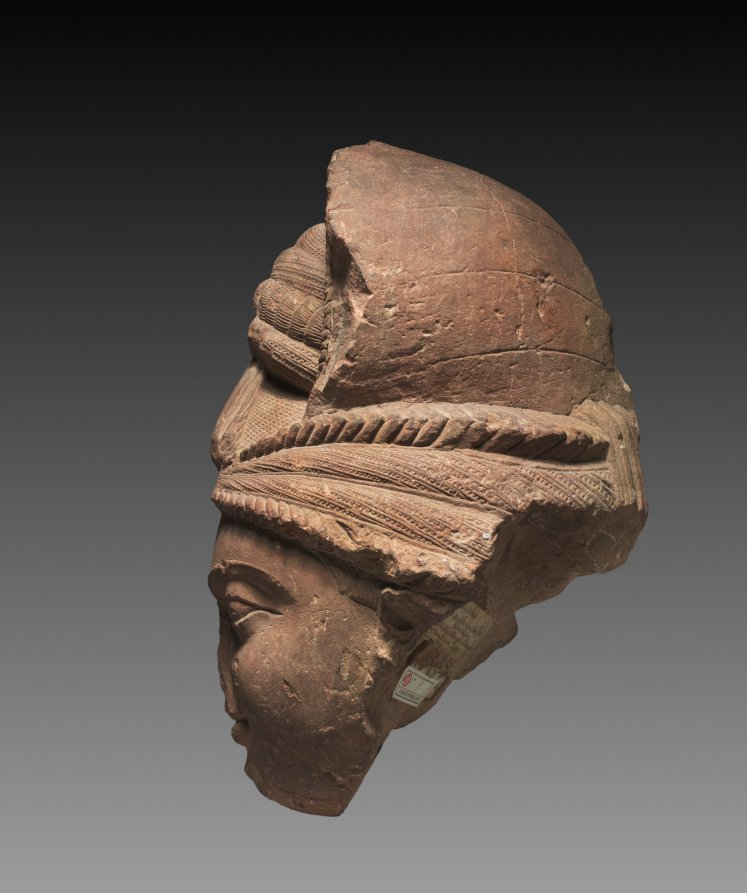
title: Head of a Bodhisattva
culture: India, Mathura, Kushan period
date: 75–early 100s CE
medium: red sandstone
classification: Sculpture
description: This monumental male head must have originally belonged to a larger-than-life Bodhisattva image. The imposing turban is of the type worn by royalty, divinities, and nobility during the Kushan period from the first through third century. The round, fleshy face, heightened by a subtle smile, retains the powerful quality of early Kushan and pre-Kushan images of nature divinities, known as yakshas.